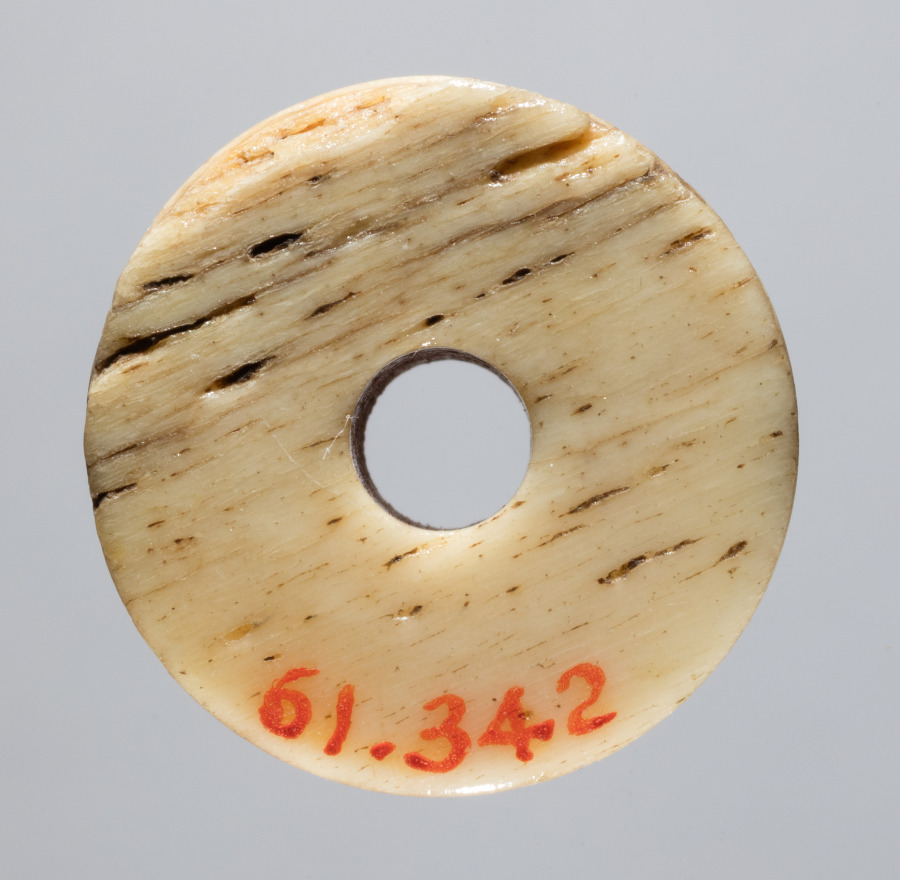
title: Spindle Whorl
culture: Iran, early Islamic period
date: 700s - 900s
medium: bone, incised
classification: Spindle Whorl